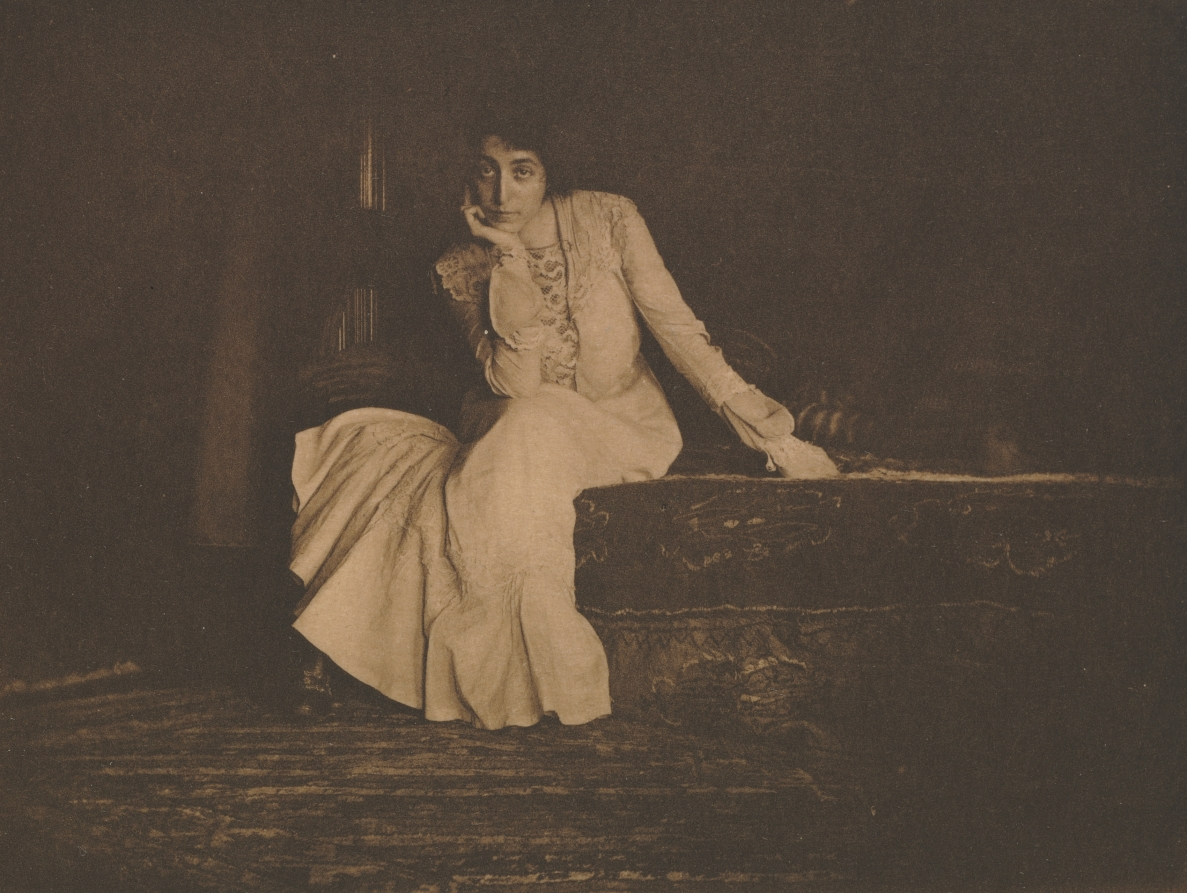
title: Camera Work: Portrait - Miss De C.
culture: America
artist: Joseph T. Keiley (American, 1969–1914)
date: 1907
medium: photogravure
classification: Bound Volume